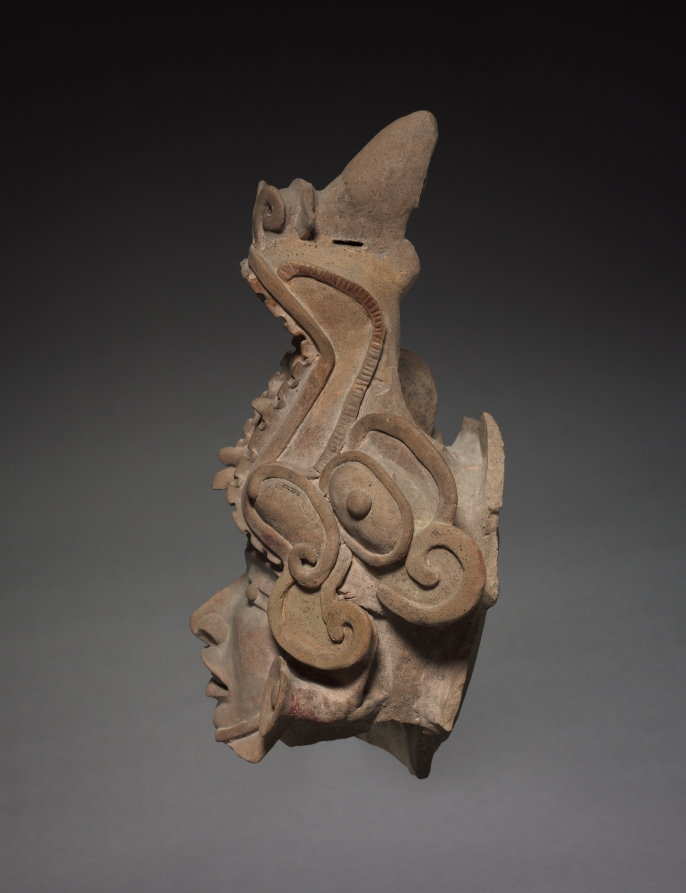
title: Head with Animal Helmet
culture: Mexico, Gulf Coast, San Andrés Tuxtla(?)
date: c. 600–1000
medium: earthenware, pigment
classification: Sculpture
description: The Gulf Coast of Mexico was an important center of ceramic sculpture production for more than 2,000 years. Nearly life-size hollow effigies, produced after about AD 600, are among the most spectacular works from this region. Although the faces were sometimes made with molds, this example appears to be hand-modeled. The mythical serpent helmet indicates that the figure may be a ritual performer.